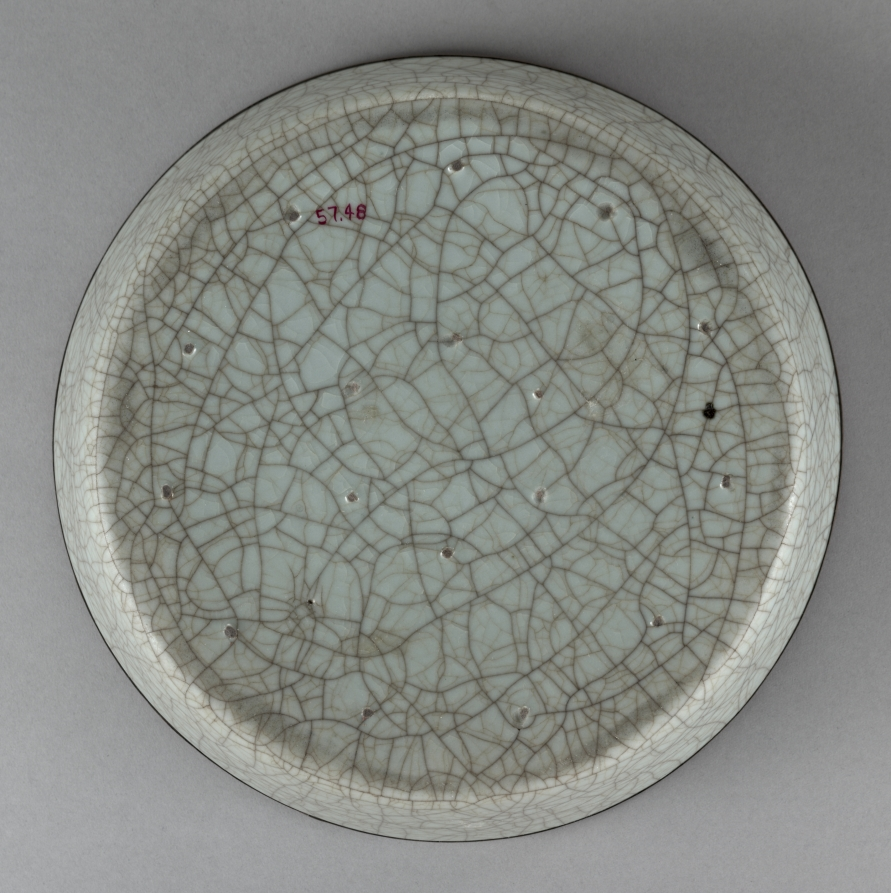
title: Basin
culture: China, Zhejiang province, Hangzhou, Southern Song dynasty (1127-1279)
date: 1127–1279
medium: porcelaneous stoneware, Guan ware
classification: Ceramic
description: Guan ware was the official ware fired at the Southern Song imperial kilns in Hangzhou. Multiple glazing is characteristic of this ware. The total thickness of the glaze can be greater than the clay body that supports it. Here, the thick gray-green glaze is webbed with a wide network of dark brown crackles as well as finer webs of light golden-brown and colorless crackles. The crackle pattern was developed after firing, due to the different rates of expansion and contraction of the body and the glaze. It was consciously exploited to achieve an aesthetic effect and was stained at different stages during the cooling process.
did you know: The base shows that the basin was fired on 17 small spurs arranged in two concentric circles.